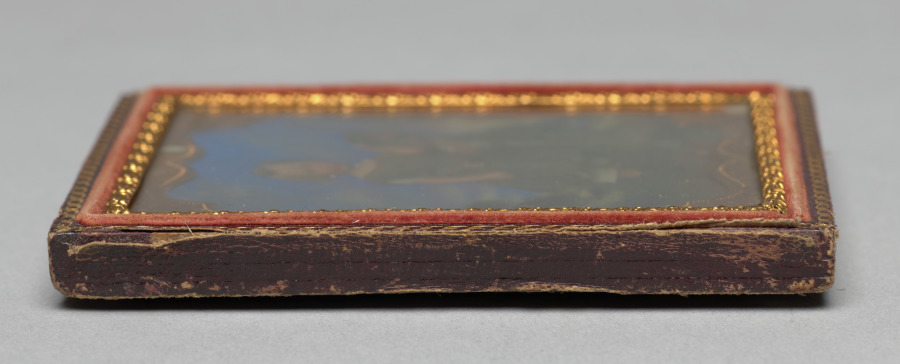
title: Boy with hobby horse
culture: America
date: c. 1862–65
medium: ambrotype, tinted, sixth plate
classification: Photograph